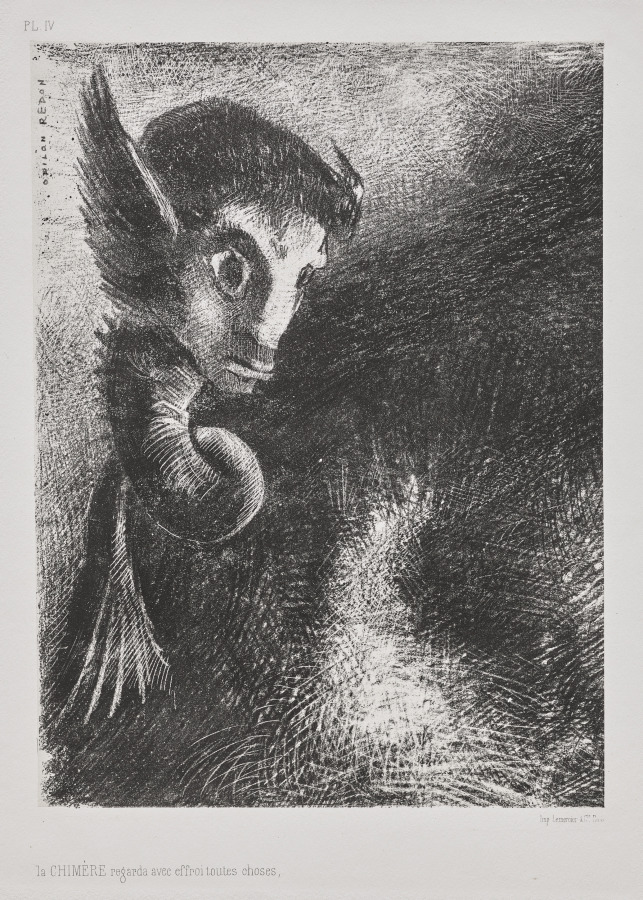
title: The Chimera Gazed at All Things with Fear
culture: France, 19th century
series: The Night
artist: Odilon Redon (French, 1840–1916)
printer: Lemercier & Cie.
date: 1886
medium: lithograph on China paper laid on wove paper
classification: Print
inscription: signed on stone, vertically at upper left: ODILON REDON; printed, below lower right corner of image: Imp. Lemercier & Cie. Paris; inscribed at center below image, in graphite: Amphibie; below lower left corner of image: la CHIMÈRE regarda avec effroi toutes choses; above upper right corner of image: PL. IV